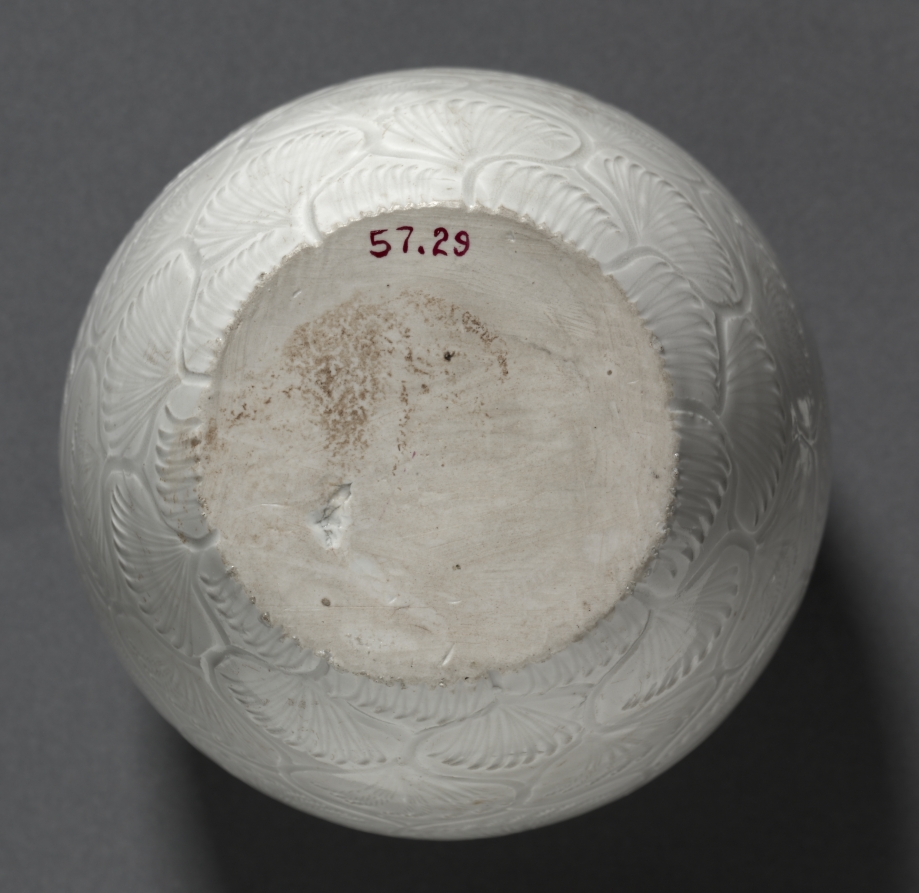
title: Jar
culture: Northeast China, Liao dynasty (916-1125)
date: 900s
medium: white porcelain with combed and incised decoration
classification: Ceramic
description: This finely potted vessel has an off-white porcelain body covered with a transparent glaze, giving an overall warm white color. A lattice of foliage patterns is combed and incised in the clay; the bold, uninhibited decoration interacts with the compact ceramic form and the subtle glazing to give it a special aesthetic appeal.